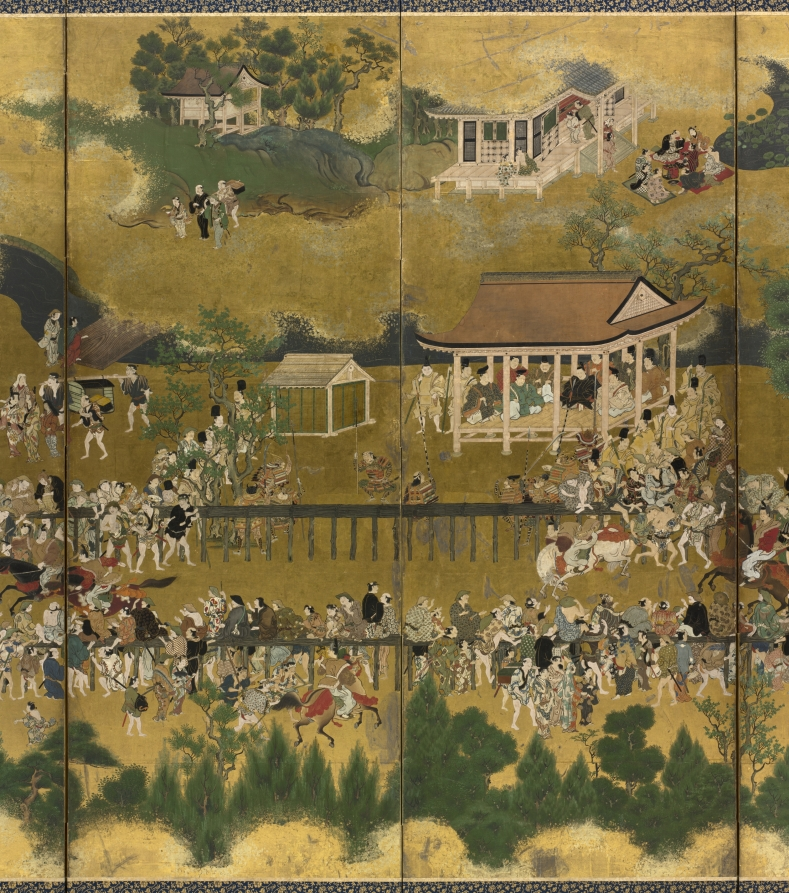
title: Horse Race at the Kamo Shrine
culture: Japan, Edo period (1615–1868)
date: early to mid-1600s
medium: One of a pair of six-panel folding screens; ink and color on gilded paper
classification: Painting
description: Kamo Shrine in Kyoto, seen in the upper half of the left screen, has held an annual horse race on May 5th since the ninth century. Serving as a snapshot of the festivities, this pair of screens captures nearly 600 people watching the race, beginning at the bottom part of the right screen and continuing to the left. The race is a great spectacle where aristocratic riders cling to their fast and unwieldy mounts. While many of those in attendance seem in rapt attention to the main event, other vignettes depict people engaged in an array of activities. This pair of screens was likely originally part of a group of linked murals.